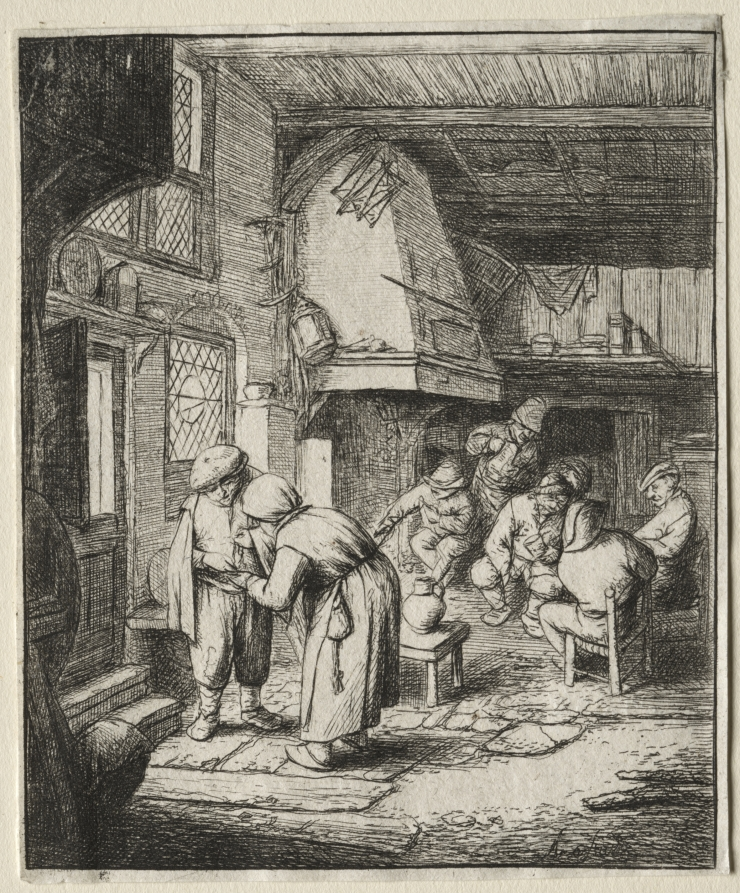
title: Peasant Settling his Debt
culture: Netherlands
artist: Adriaen van Ostade (Dutch, 1610–1684)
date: c. 1647–53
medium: etching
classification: Print